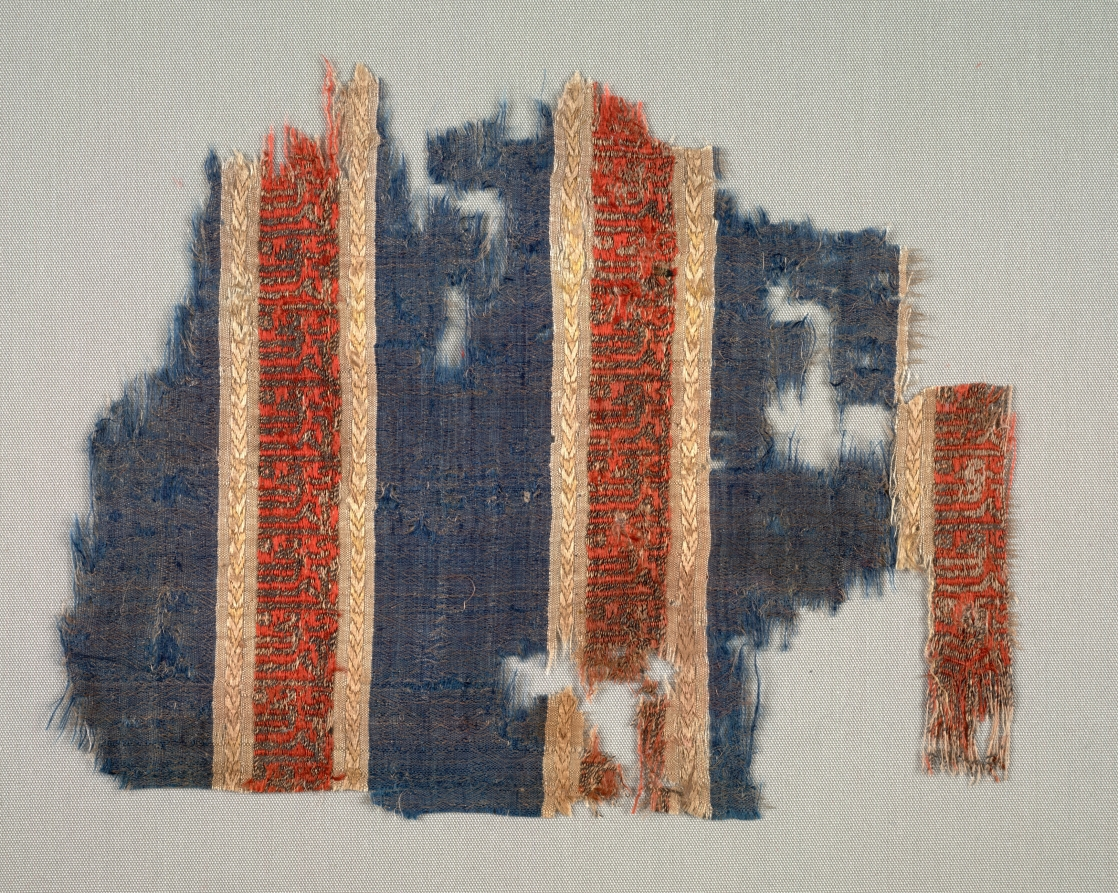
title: Silk fragment with decorated and inscribed bands, from the tomb of Don Felipe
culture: Spain, probably Almeria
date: 1200s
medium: Silk: plain weave with supplementary weft, silk and silver thread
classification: Textile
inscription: band of Naskhi inscription of red on silver which reads: "Praise be to God."